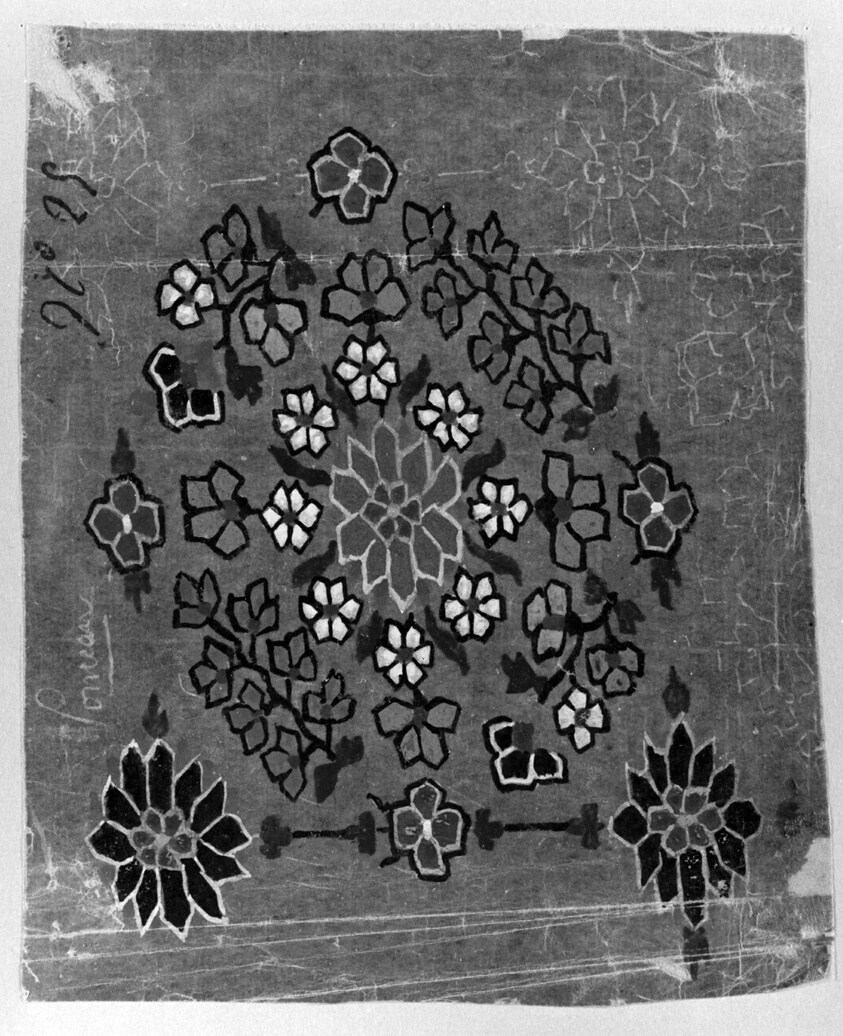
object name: Book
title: Book of 76 Painted Designs for Woven Textiles (Volume II)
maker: France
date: 1815/40s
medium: Paper, gouache, varnish or oil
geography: France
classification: textile; book